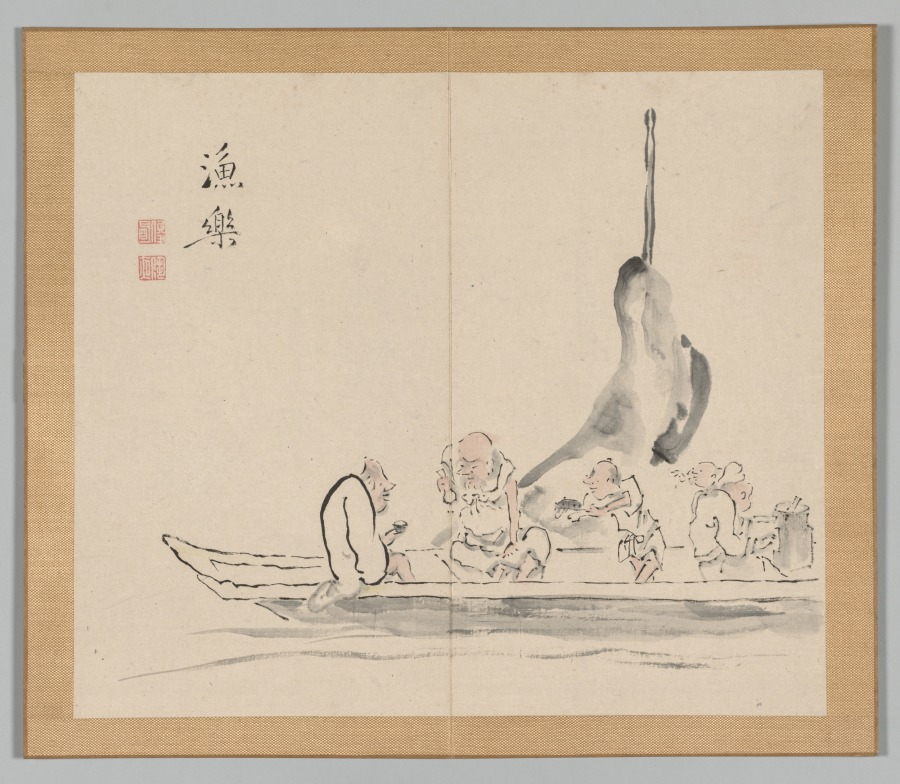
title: Reverberations of Taiga, Volume 2 (leaf 28)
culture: Japan, Edo period (1615–1868)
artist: Aoki Shukuya (Japanese, d. 1802)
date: mid- to late 1700s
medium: double-leaf from a pair of albums; ink and light color on paper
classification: Portfolio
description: Traditionally, young painters in Japan began their studies with an established master-painter. The master's compositions invariably became models that the apprentice copied to learn various ink and brush techniques. Shukuya was a pupil of the famous Kyoto artist Ikeno Taiga, whose style is reflected in these sketches of rocks, trees, and mountains.